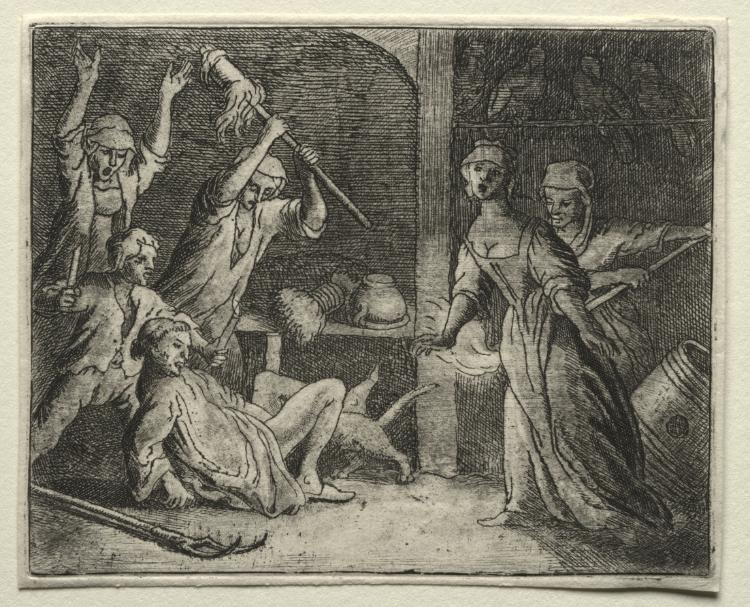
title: Reynard the Fox: The Cat is Trapped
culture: Netherlands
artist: Allart van Everdingen (Dutch, 1621–1675)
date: 1650–75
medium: etching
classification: Print